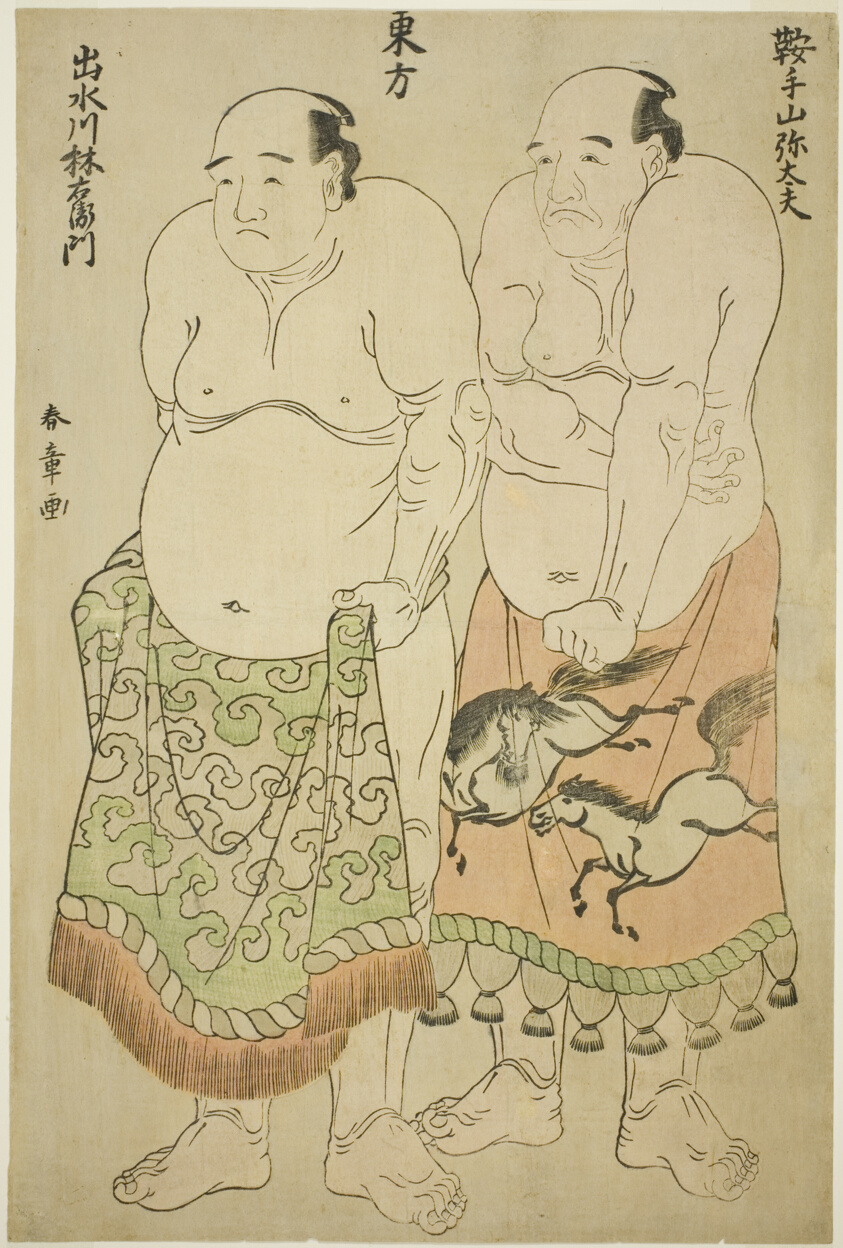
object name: Print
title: Sumo Wrestlers of the Eastern Group: Kurateyama Yadayû and Izumigawa Rin’emon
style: Japanese (culture or style)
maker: Katsukawa Shunshô 勝川 春章; Japanese, 1726-1792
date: About 1780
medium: Color woodblock print; ôban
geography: Japan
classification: woodblock print; print; asian art